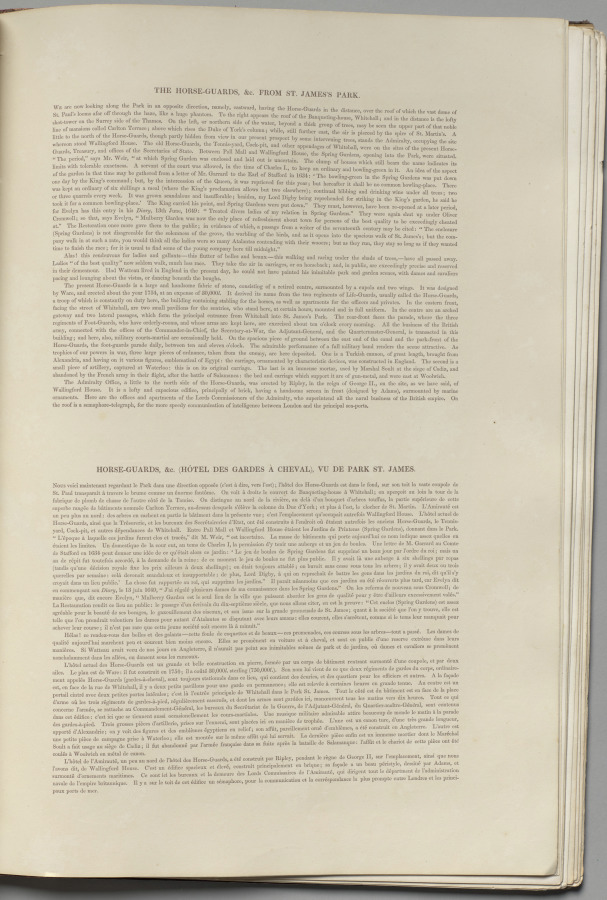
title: London As It Is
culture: England, 19th century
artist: Thomas Shotter Boys (British, 1803–1874)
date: 1842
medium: lithograph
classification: Bound Volume